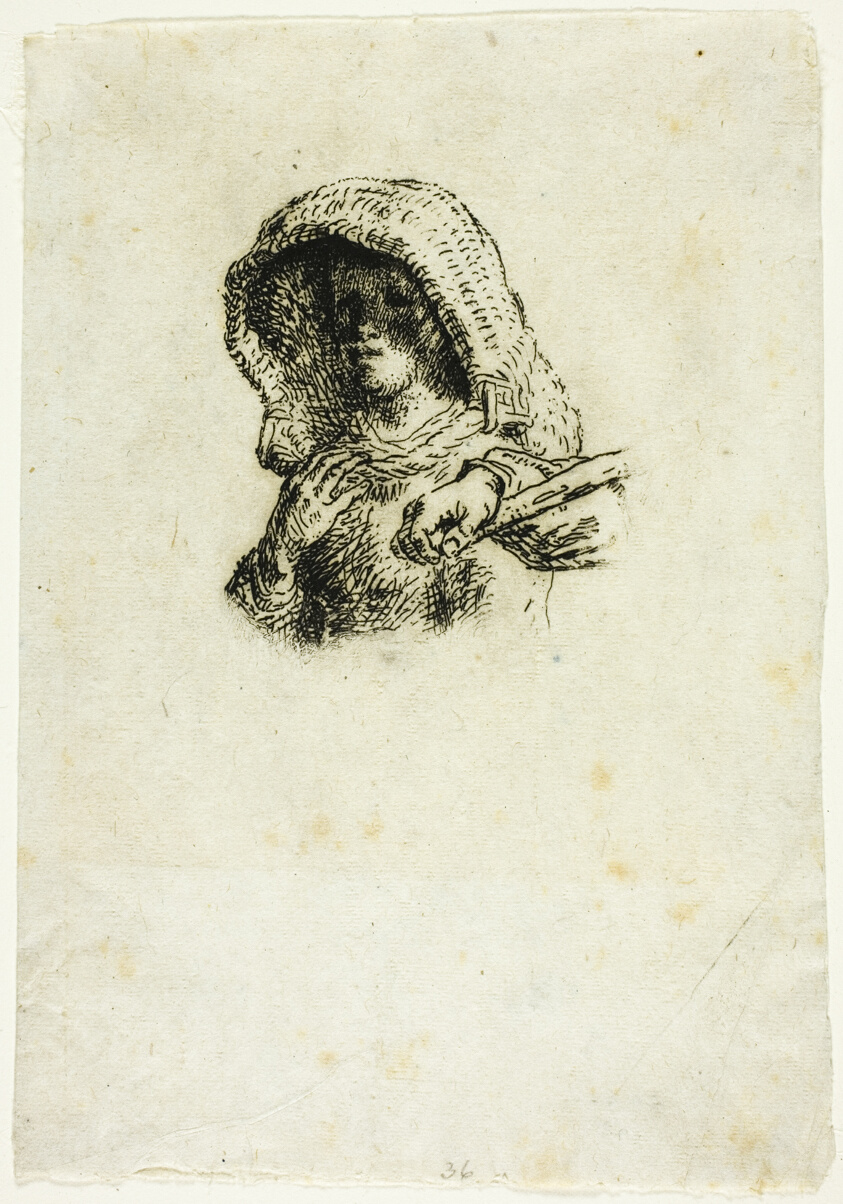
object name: Print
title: Peasants Going to Work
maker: Jean François Millet (French, 1814-1875)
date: 1863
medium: Etching from a portion of the plate on ivory laid chine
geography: France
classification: etching; print; prints and drawing